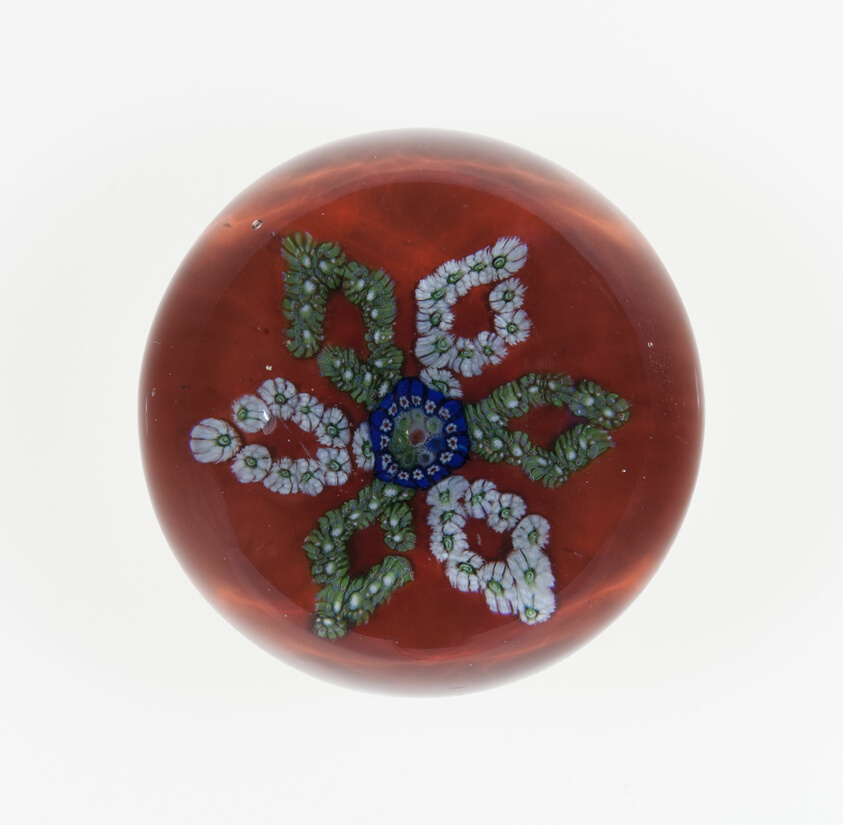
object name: Glass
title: Paperweight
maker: Saint-Louis Glassworks (Cristalleries de Saint-Louis); Lorraine, France, founded 1586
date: c. 1845–55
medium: Glass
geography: Saint-Louis-lès-Bitche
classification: paperweight; lampwork; european decorative arts; glass